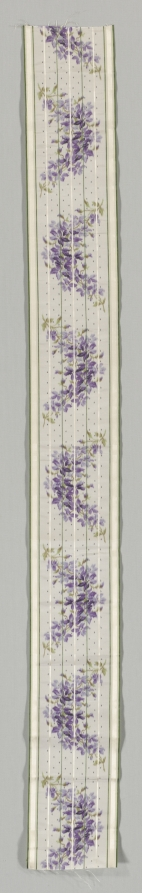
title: Ribbon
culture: France, 19th century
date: 1800s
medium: silk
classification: Textile